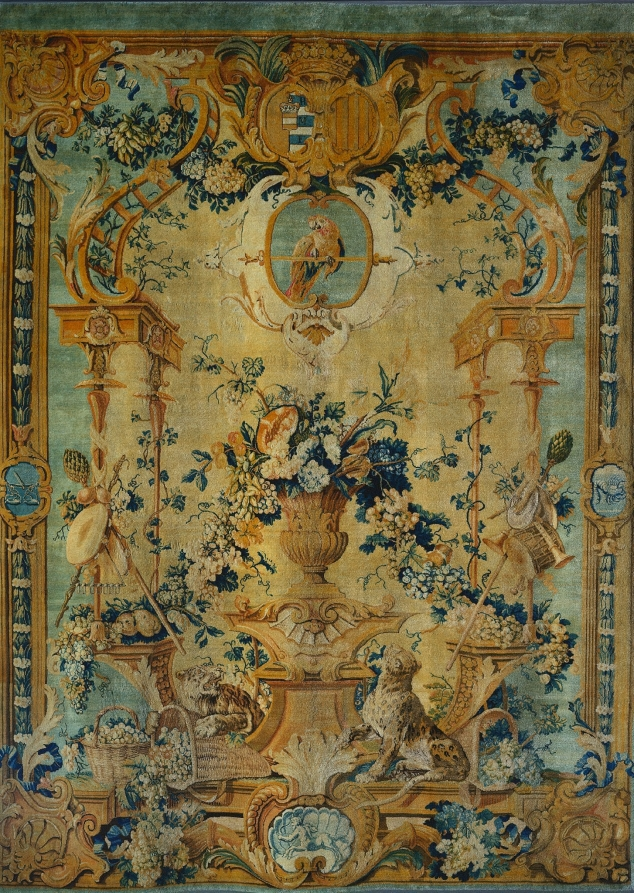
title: Savonnerie Panel: Autumn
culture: France, 18th century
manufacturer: Royal Savonnerie Manufactory, Chaillot Workshops (French, est. 1627)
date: c. 1717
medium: knotted pile, silk and wool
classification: Carpet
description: Courtiers and aristocrats anxious to model their lifestyles on the king also commissioned works from the same state manufactories that produced tapestries, carpets, and upholstery for the French monarchy. Established in the early 1600s, the Savonnerie factory provided both domestic furnishings for the king’s palaces and diplomatic gifts for foreign heads of state. The double coat of arms in this tapestry suggests that it was made for a count and countess who married in 1717. One of a group of four tapestries depicting the seasons, this work depicts the abundant harvest of fall. The Cleveland Museum of Art rotates this tapestry with another from this group. The other two tapestries in the suite can be seen at the Toledo Museum of Art.